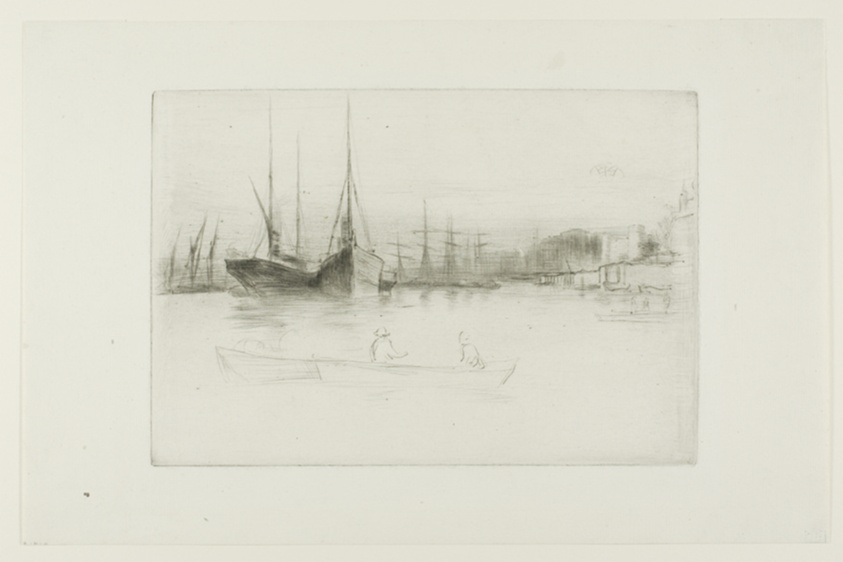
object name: Print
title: Steamboats off the Tower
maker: James McNeill Whistler (American, 1834-1903)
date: 1875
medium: Drypoint in black ink on off-white laid paper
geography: United States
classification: drypoint; print; prints and drawing; paper